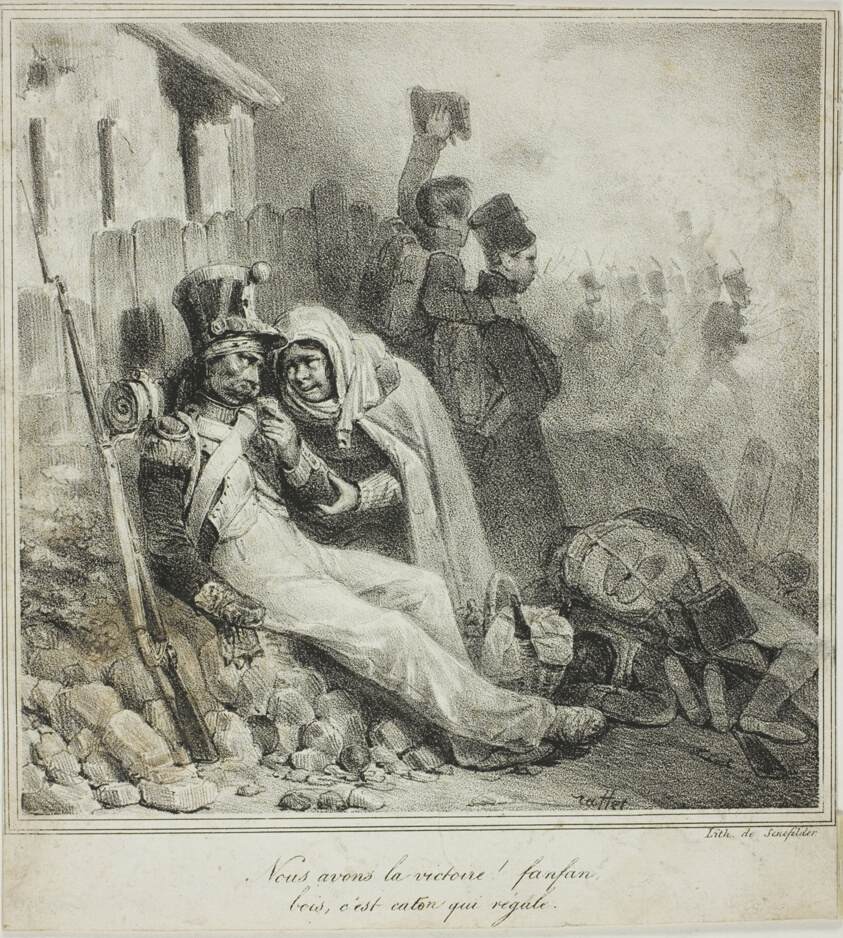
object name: Print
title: We Have Won!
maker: Denis Auguste Marie Raffet (French, 1804-1860); printed by Alois Senefelder (German, 1771-1834)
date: 1825–26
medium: Lithograph in black on ivory wove paper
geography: France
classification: lithograph; print; prints and drawing